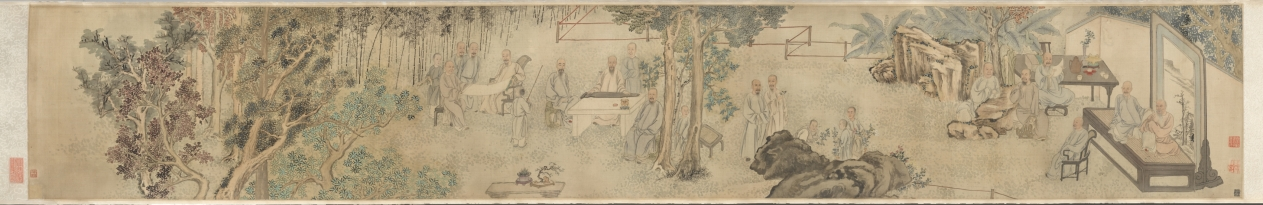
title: The Ninth Day Literary Gathering at Xing’an [Temporary Retreat]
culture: China, Qing dynasty (1644-1911)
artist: Fang Shishu (Chinese, 1693–1751)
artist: and Ye Fanglin (Chinese, active late 1600s–mid-1700s)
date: 1743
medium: Handscroll; ink and color on silk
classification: Painting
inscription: Fang Shishu's seal at beginning of painting: Ou ran shi de 偶然拾得. Ye Fanglin's seal at end of painting: Fanglin 芳林. Frontispiece title dated 1743 and 3 seals of Chen Bangyan 陳邦彦 (1678-1752).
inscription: 行庵在揚州北郭天寧寺西隅，馬君嶰谷半槎兄弟購僧房隙地所築，以為游息之處也。寺為晉謝太傅別墅。西隅饒古木，䨴鬱陰森，入林最僻，不知其近郛郭。庵居其中，無斲礱髤采之飾，惟軒庭多得清蔭，來憩者每流連而不能去。乾隆癸亥九日，積雨既收，風日清美，遂約同人，咸集於斯，中縣［懸］仇英白描陶靖節像，采黃花，酌白醪為供，乃以人世難逢開口笑，菊花雖插滿頭歸分韻賦詩。陶陶衎衎，觴詠竟日。既逾月，吳中寫真葉君敬［震］初適來，群貌小像，合為一卷，方君環山補景，命曰九日行庵文讌圖。裝池成，將各書所作於後，而囑鶚為之記。記按圖中共坐短榻者二人：右箕踞者，為武陵胡復齋先生期恆；左抱膝者，為天門唐南軒先生建中也。坐繩床者二人：中手牋者，歙方環山士庶；左仰首如欲語者，江都閔玉井華也。一人坐藤塾捻髭者，鄞全謝山祖望也。一人倚石坐若凝思者，臨潼張漁川四科也。樹下二人：離立把菊者，錢唐厲樊榭鶚；袖手者，錢唐陳竹町章也。一人憑石床坐撫琴者，江都程香溪先生夢星也。聽者三人：一人垂袖立者，祁門馬半查曰璐；二人坐瓷塾，左倚樹、右跂腳者，歙方西疇士疌 、汪恬齋玉樞也。二人對坐展卷者，左祁門馬嶰谷曰琯，右吳江王梅沂藻也。一人觀者，負手立於右，江都陸南圻鐘輝也。從後相倚觀者一人，歙洪曲溪振珂也。童子種菊者三人：樹間侍立者一人，撰杖、執卷者各一人。其植有蕉、有竹，又有雜樹，作丹黃青碧之色，紀時也。夫重九佳名，舉俗所重，而高常侍歎獨坐而搔首，陸天隨感登高以剫門，無其時地與人耳。今吾儕幸生太平，遇勝地，又皆素心有文之侶，固人世不可多得之會；而此十六人者，或土斷，或客游，聚散不常。異日者，歲月遷流，撫節物以有懷，一披此圖，悅如晤對。將來覽者，或亦不異此意乎。甲子夏五十有四日厲鴞記並書。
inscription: 揚州為江北大都會，居民連甍接楹，笙歌輿從，竟日喧聚，其於淸歌雅集，葢罕矣。城北天寧寺，為晉謝公駐節時所游息，其中有行庵，吾友馬君嶰谷、半查兄弟之小築也。地不踰五畝，而老樹古藤，森蔚相望，皆千百年物，間以修竹，春鳥秋蟲，更唱迭和，其間曲廊高榭，位置閑適。出門未數百步，即黃塵濁流極目，令人作惡。而此中獨蕭然有人外之思。乾隆八年九日，嶰谷兄弟招集同社一十四人祀陶公，出所藏仇實父白描像懸於閣上，各賦一詩。予方留滯西泠，未得預也。又踰旬而予至，諸君方擬繪圖記事，嶰谷曰：是不可無君。乃以展日更舉，令予得陪卷軸之末；而洪君曲溪，兩度皆以病失約，然故吟社中人也，亦補入焉。予太息謂諸君曰：謝公之風流，千古如在；然其游息於斯也，則與東山賓從之樂稍不同矣。公之為是行也，蓋以符氏之亂，思北定中原也。而其時公巳困於讒口，不自安於朝；雖在河朔極有可乘之會，而神明內索，徘徊不克自前。老師左次，竟無尺寸之功，坐失事幾。吾常過邵伯之埭，吊法雲之荒祠，未嘗不喟然累啼，以為明德之衰也。至若九日嘉名，陶公高格，固在羲皇懷葛之間；然而讀其 止酒之詩，蒼梧漢水之感，以瘦詞寄其孤憤則夫黃花白酒，蓋亦不得巳而漫與焉者。今吾輩生逢太平之日，書淫墨癖，是處留連，胸次中了無一事，為江湖之幸民，論人雖甚媿，論其時與地，則不可不私相慶也。諸君曰：善。圖之詳巳見於厲君樊榭記中。予之許為嶰谷兄弟序斯圖也，三年於茲；今夏重披圖捉筆，而唐丈南軒，巳化為異物矣。對酒當歌，人生幾何，願與諸君並日相遇從焉。丙寅夏杪孤山社小泉翁全祖望序。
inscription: 6 additional colophons and 15 additional seals: 1 colophon, dated 1746, and 1 seal of Huang Zhijun 黃之雋 (1668-after 1746); 1 colophon and 2 seals of Zha Xiang 查祥 (1718 jinshi); 1 colophon, dated 1746, and 3 seals of Zhang Siwen 張思問; 1 colophon, dated 1748, and 4 seals of Shao Dong 卲東 (1721 jinshi); 1 colophon, dated 1753, and 2 seals of Fang Shiju 方世舉 (signing as Fang Funan 方扶南); 1 colophon, dated 1808, of Ruan Yuan 阮元 (1764–1849); 3 seals unidentified.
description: By the 1700s, Yangzhou was flourishing both economically and culturally as the most prosperous city in China, having surpassed all other Jiangnan cities in their creation of gardens. This group portrait commemorates a literary gathering in the private garden of the salt merchants and art patrons Ma Yueguan (1688–1755) and his brother Ma Yuelu (1697–after 1766) in Yangzhou. Ma Yueguan received imperial recognition for providing financial aid and food relief for those affected by flood and drought. Ma Yueguan is seen seated at the end of the painting holding an open scroll while Ma Yuelu stands behind the qin instrument player. Among the guests were officials, scholars, poets, painters, and merchants, a mix of local members of a poetry club reflecting increasing social diversity.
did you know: The two hosts and their fourteen guests were all officials, scholars, poets, painters, and salt merchants.